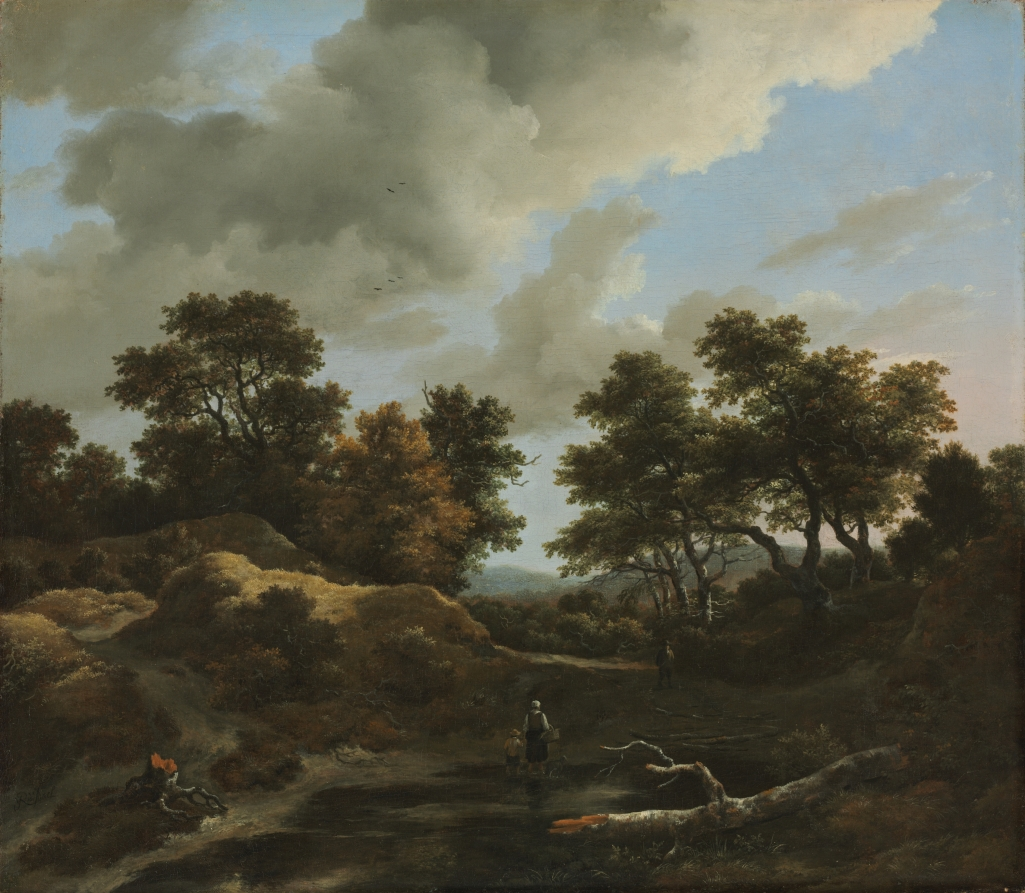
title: Wooded and Hilly Landscape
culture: Netherlands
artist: Jacob van Ruisdael (Dutch, 1628/29–1682)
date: 1660s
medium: oil on canvas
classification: Painting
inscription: Signed lower left: "JvRuisdael [JvR in monogram]"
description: Jacob van Ruisdael, one of the most eminent Dutch landscape painters, is revered for his brooding woodland compositions. With much of this painting's composition dedicated to nature alone, an underlying sense of sublimity is heightened by Ruisdael through the inclusion of several diminutive figures. A mother and child trudge through a weathered path in the foreground, their pet dog following closely at their side, while a lone traveler approaches from the foliage ahead of them. This work is an excellent representation of the artist's later period, speaking to both his preoccupation with meticulous detail and the transitory relationship between humans and nature.